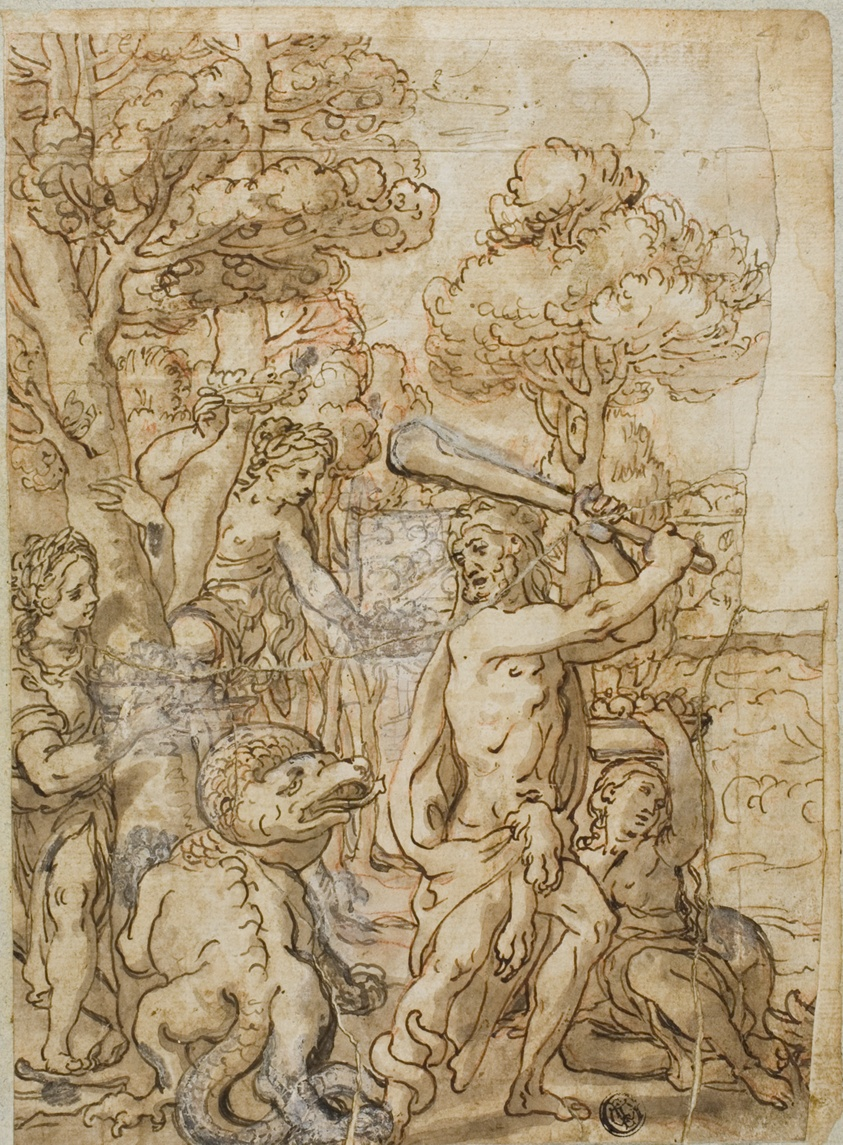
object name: Drawing and Watercolor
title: Hercules Slaying the Serpent Ladon in the Garden of the Hesperides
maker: Andrea Lilio (Italian, 1555-1642); or Lazzaro Tavarone (Italian, 1556-1641); or Style of Pietro da Cortona (Italian, 1596-1669)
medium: Pen and brown ink with brush and brown wash, heightened with lead white (discolored), over red chalk, on ivory laid paper, laid down on ivory laid paper, laid down on blue laid paper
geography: Italy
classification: pen and ink drawings; drawings (visual works); prints and drawing